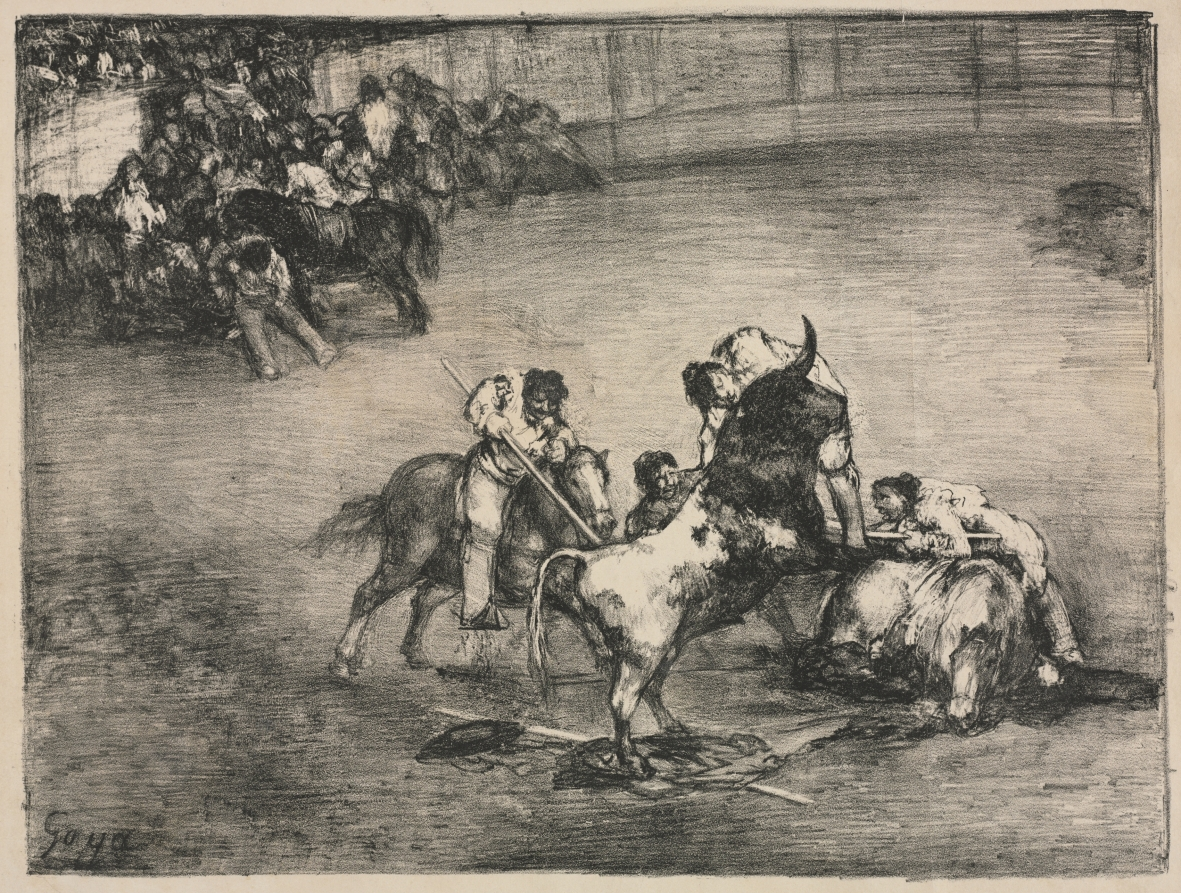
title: The Bulls of Bordeaux: Picador Caught by a Bull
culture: Spain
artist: Francisco de Goya (Spanish, 1746–1828)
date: 1825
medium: lithograph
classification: Print